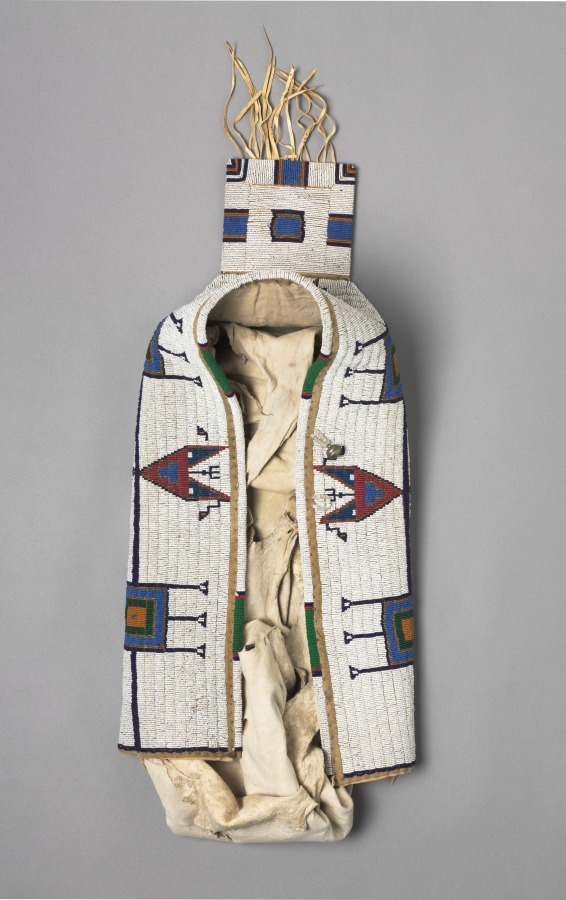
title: Cradle or Baby Carrier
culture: Native North America, Plains, Lakota (Sioux)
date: c. 1900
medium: Native-tanned hide, cotton cloth, glass beads, metal beads, brass bell, sinew thread, cotton thread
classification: Leather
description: Many Plains peoples hold lavishly quilled or beaded cradles in high esteem—they bestow spiritual benefits on the infant and prestige and honor on the family and the maker, usually a female relative. Indeed, today and in the past, creating such a cradle is often regarded as equal to counting coup, the ultimate act of male bravery in which a warrior touches an enemy with a stick known as a coup stick. This cradle was held in the arms; others have wooden frames that can be propped against a support, such as a sofa or a tree, to ease the baby’s socialization into the community.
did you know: In the past, young Plains children spent much of their time in cradles, which remain in occasional use today.